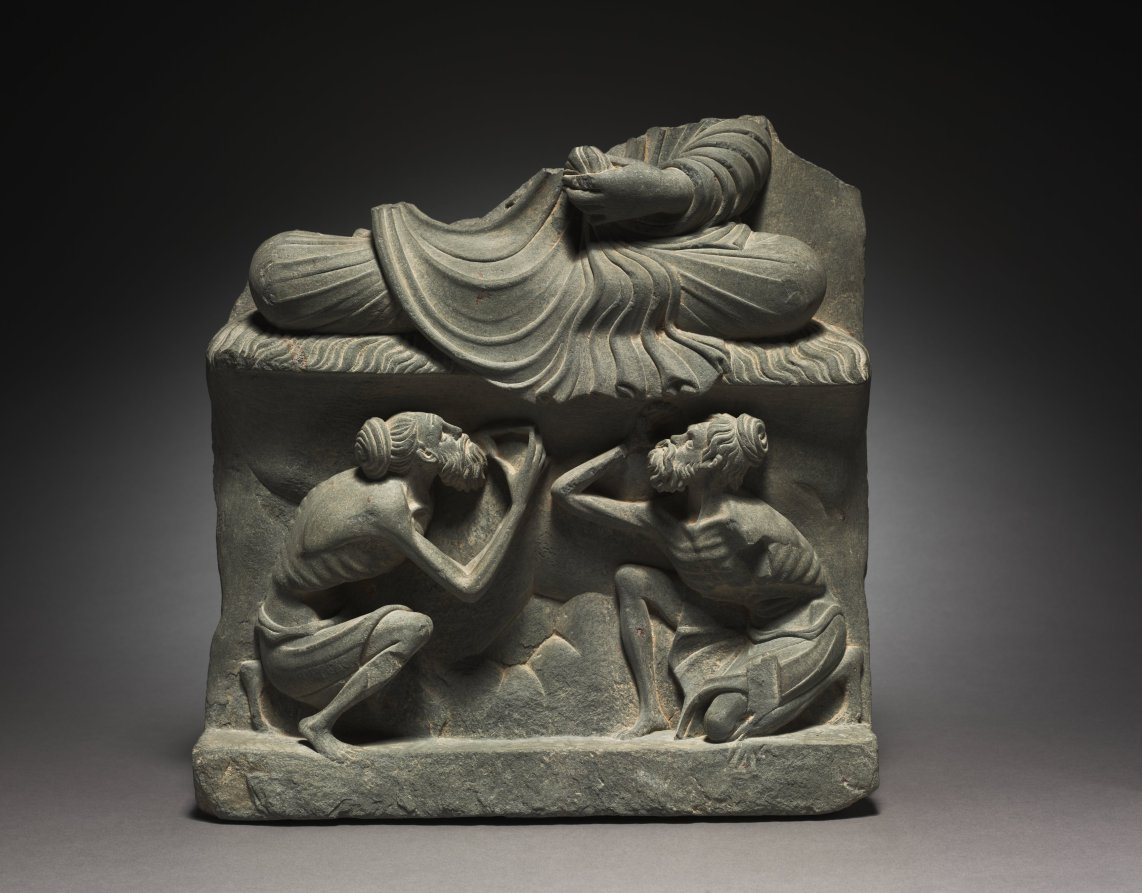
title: Base for a Seated Buddha with Figures of Ascetics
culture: Pakistan, Gandhara, Kushan period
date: c. late 100s CE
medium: gray schist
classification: Sculpture